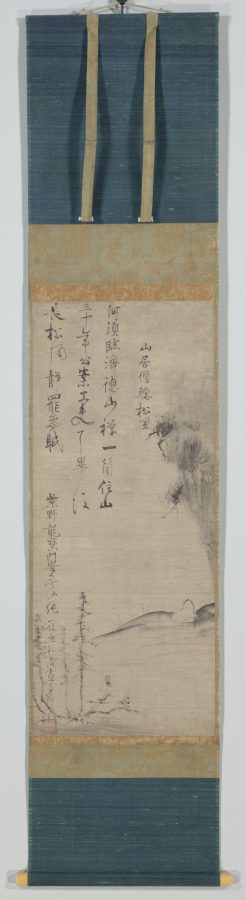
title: Listening to the Wind in the Pines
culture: Japan, Muromachi period (1392–1573)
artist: Ikkyū Sōjun (Japanese, 1394–1481)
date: 1400s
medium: hanging scroll; ink on paper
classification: Painting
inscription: 山居僧聴松風/何須臨済徳山禅一箇住山/三十年公案工夫了畢後/長松風静罷参眠 (transcribed by Trevor Menders with Zheng Xiaoying 2017, revised by Osvaldo Mercuri 2021)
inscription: 紫野龍寶門客东海純一休老和尚畫と詩一筆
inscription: 落款 一休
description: A monk sits in contemplation below an overhang covered with pine. The poem, titled "Monk in the Mountains Listening to the Wind in the Pines," refers to two Chinese Chan (Zen) Buddhist monks active in the ninth century. It may be translated as follows: Why must the Zen of Rinzai (Linji Yixuan) and Tokusan (Deshan Xuanjian) reside in a single temple for thirty years? Once he's solved his kōan, (the monk) ends his practice and falls asleep in the quietness of the wind among the tall pines. (translated by Osvaldo Mercuri) According to an inscription following the poem, both painting and verse were done by an eminent Japanese Buddhist monk known for revitalizing the Kyoto temple Daitokuji.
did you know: The word mountain, appearing in the title to the poem on this painting, can also refer to a temple.